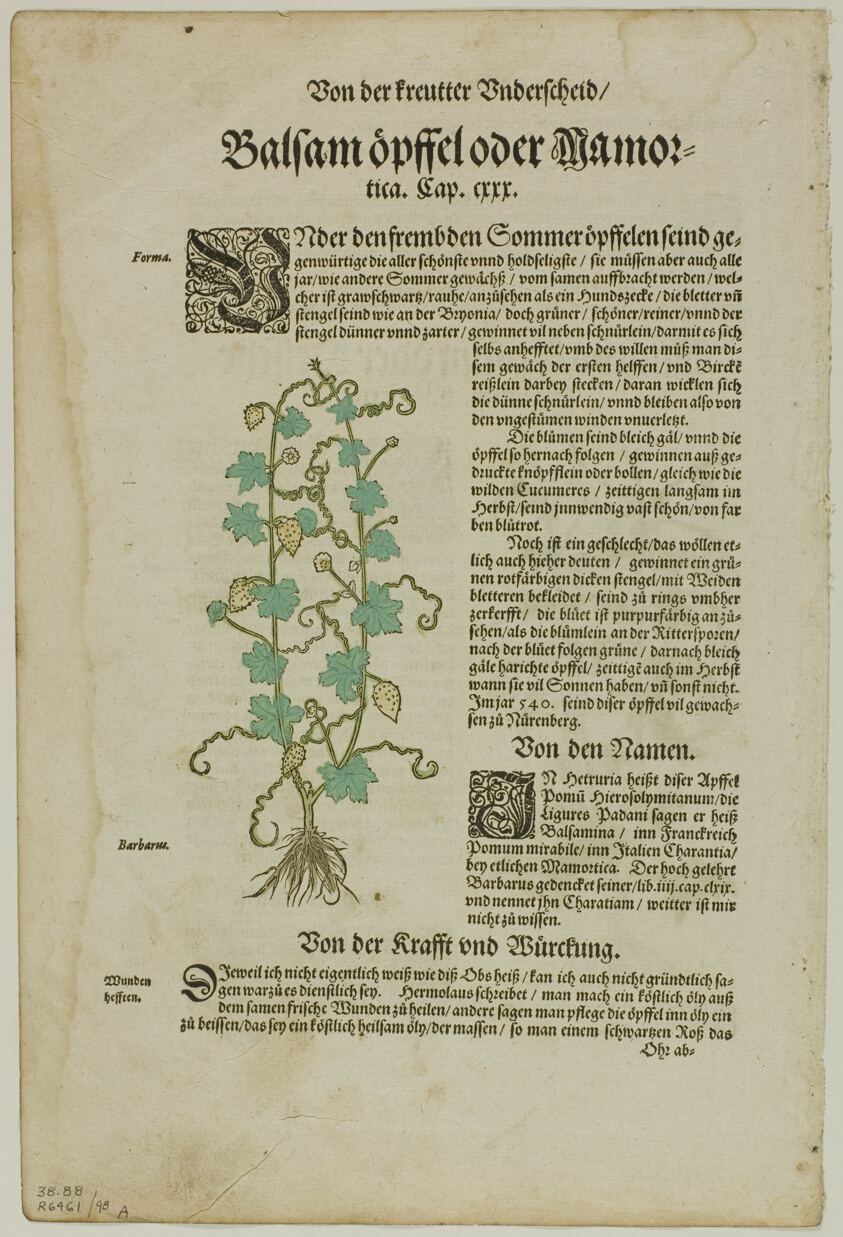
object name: Print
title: Leaf from New Kreuterbuch by Hieronymus Bock, plate 98 from Woodcuts from Books of the XVI Century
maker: Attributed to David Kandel (German, c. 1520/25-1592/96); assembled by Max Geisberg (Swiss, 1875-1943)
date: 1580, assembled into portfolio 1937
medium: Woodcut on paper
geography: Germany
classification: woodcut; print; prints and drawing